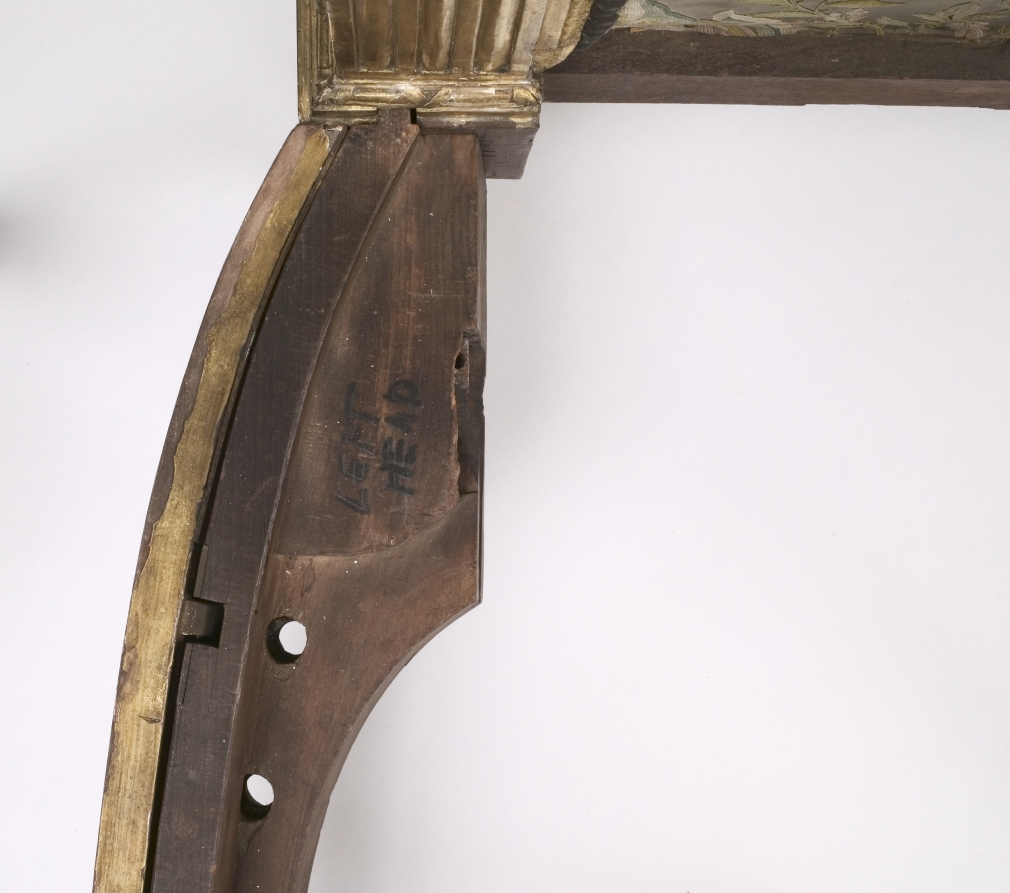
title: Bed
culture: France, 18th century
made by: attributed to Georges Jacob (French, 1739–1814)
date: 1700s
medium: gilded wood and embroidered satin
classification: Furniture and woodwork